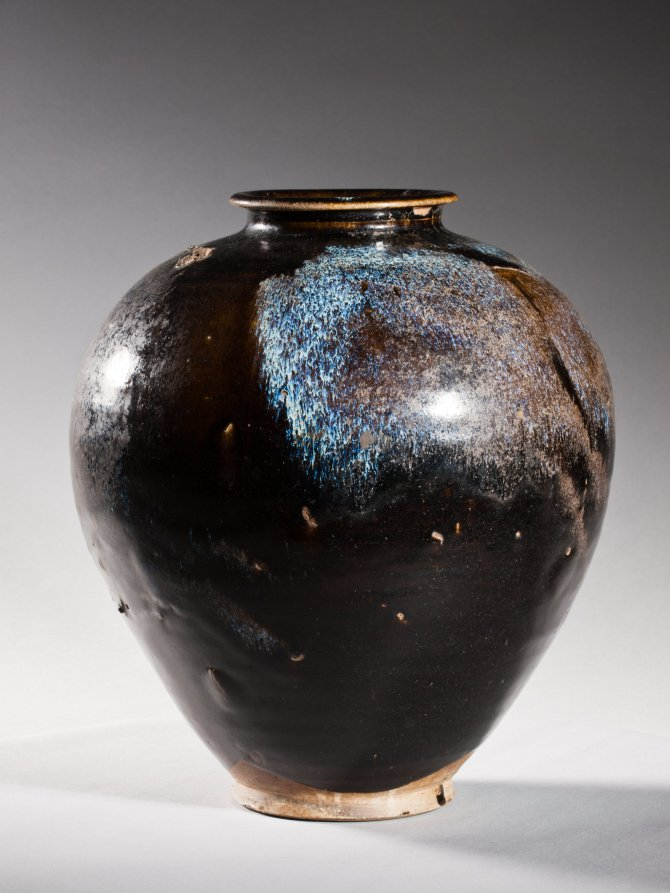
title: Jar: Black Ware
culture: China, Henan province, Huangdao kilns, Tang dynasty (618-907)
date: 700s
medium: glazed stoneware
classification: Ceramic